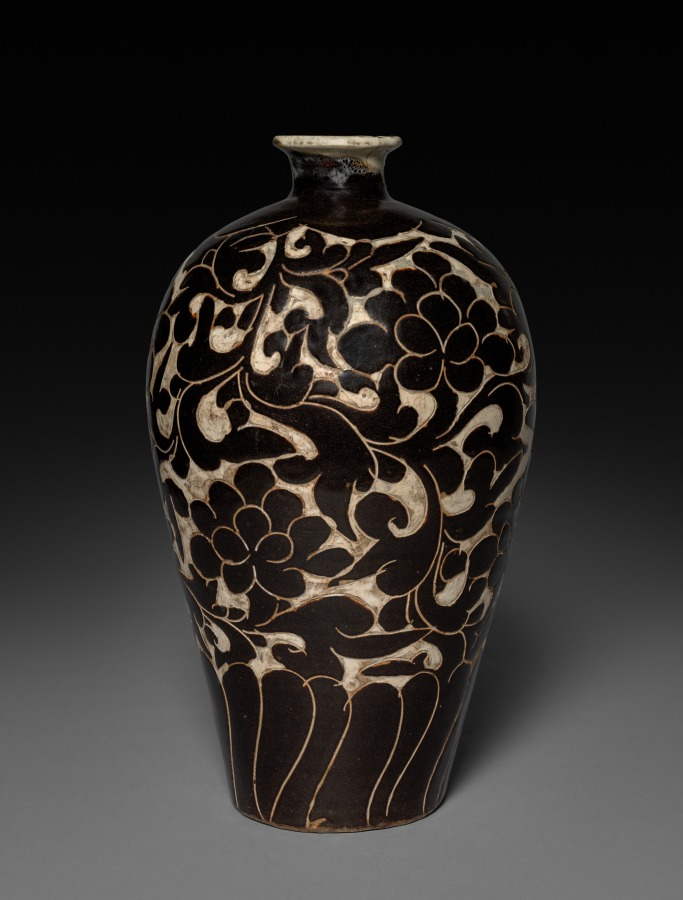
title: Vase with Peony Decoration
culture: China, Northern Song dynasty (960-1127)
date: 1000s-1100s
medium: Gray stoneware with underglaze slip decoration, Cizhou ware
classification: Ceramic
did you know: The thick foot rim is unglazed, while the shallow recessed flat base is covered with white slip and chance accumulations of underglaze pigment.